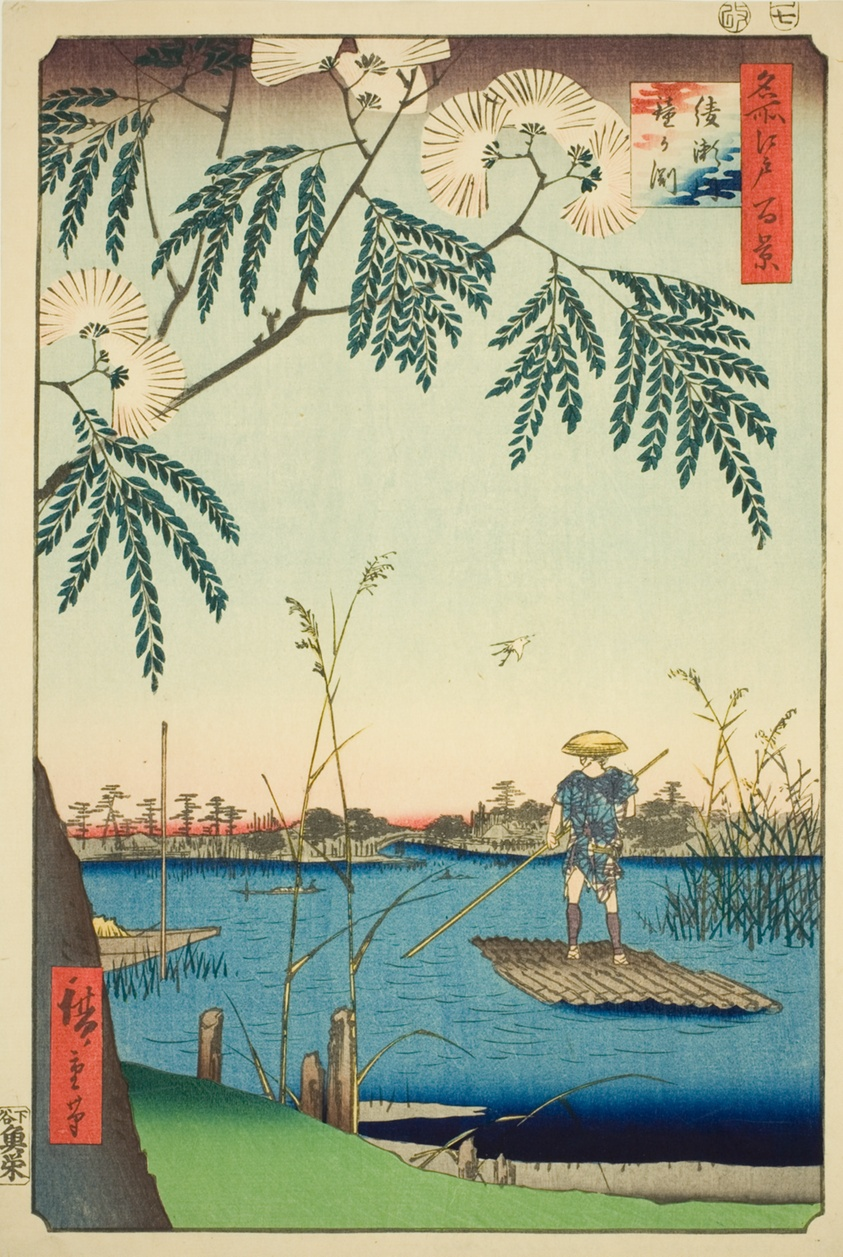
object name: Print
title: Ayase River and Kanegafuchi (Ayasegawa Kanegafuchi), from the series "One Hundred Famous Views of Edo (Meisho Edo hyakkei)"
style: Japanese (culture or style)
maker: Utagawa Hiroshige 歌川 広重; Japanese, 1797-1858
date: 1857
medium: Color woodblock print; oban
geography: Japan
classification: woodblock print; print; asian art